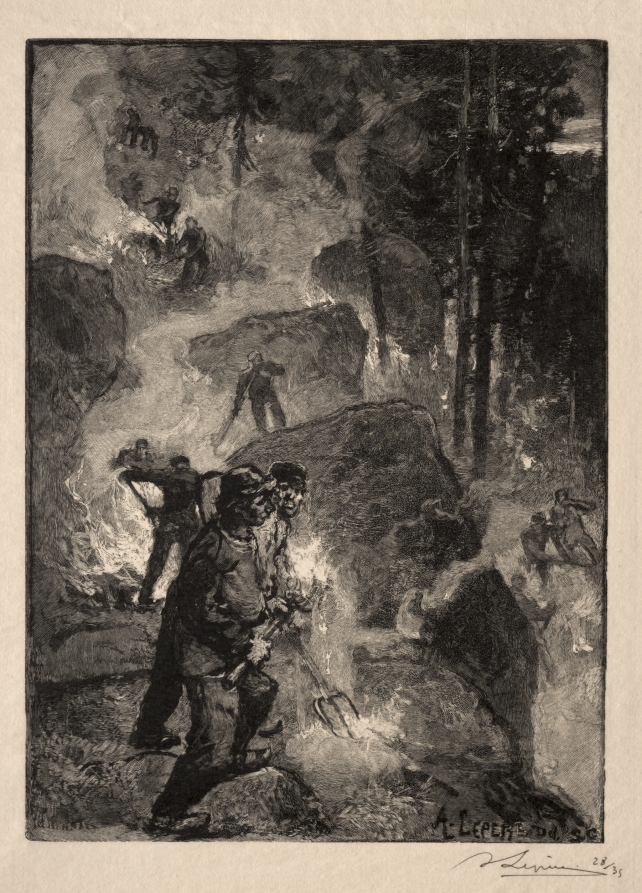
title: Brûleurs de Fougères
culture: France, 19th century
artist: Auguste Louis Lepère (French, 1849–1918)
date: 1887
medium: wood engraving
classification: Print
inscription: On block, lower right corner: "A. Lepère del. sc."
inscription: Signed in ink: "28/35 1887"